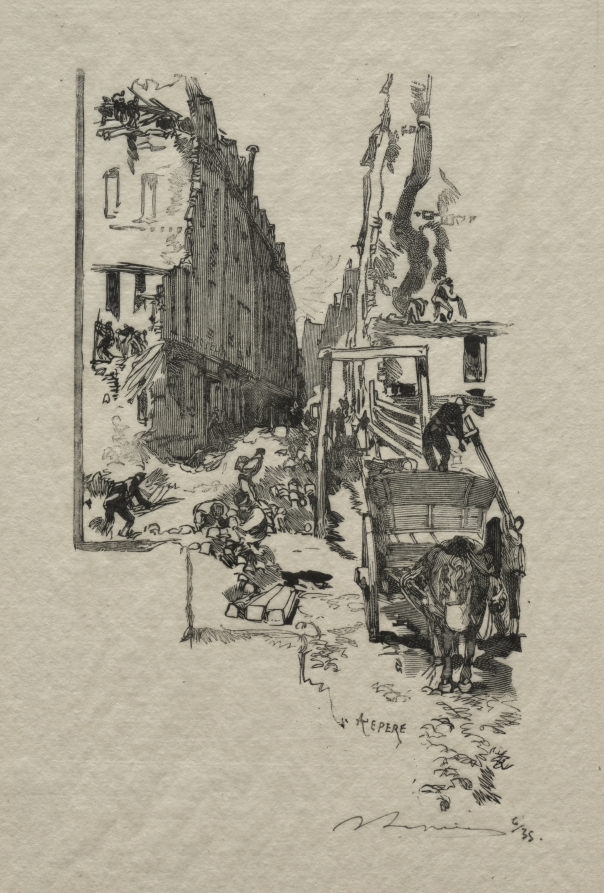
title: La Rue Victor Cousin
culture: France, 19th-20th century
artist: Auguste Louis Lepère (French, 1849–1918)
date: c. 1870–1918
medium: wood engraving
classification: Print